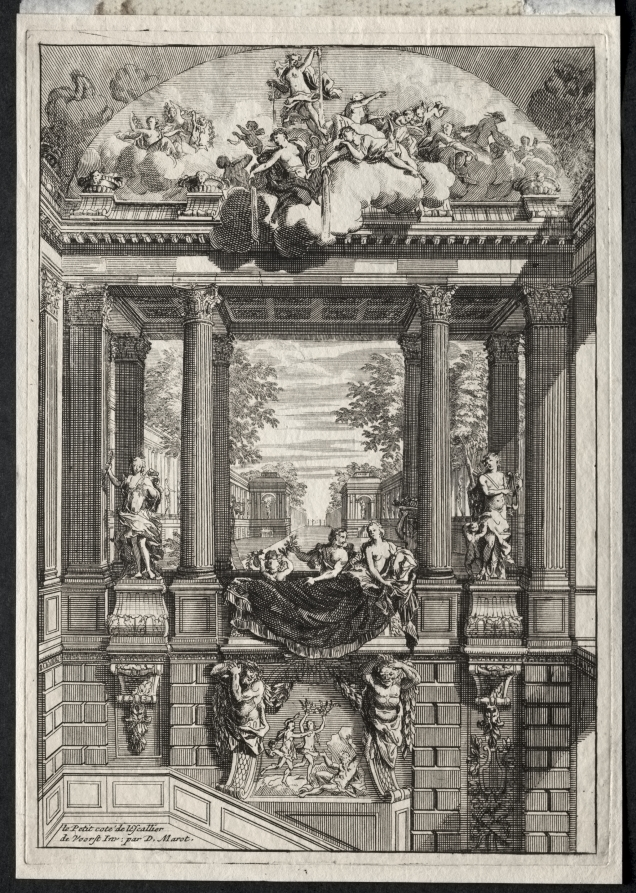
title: Staircase at the Palace of Voorst in Holland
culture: France, 18th century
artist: Daniel Marot (French, 1655–1718)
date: c. 1700–18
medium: engraving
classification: Print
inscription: Inscribed in plate: le Petit coté de lEscalier/de Voorst Inv: per D. Marot (l.l..)